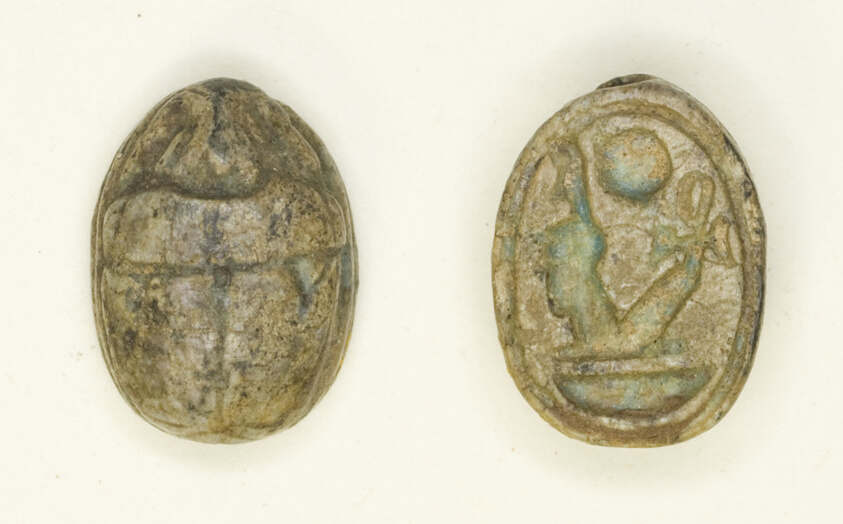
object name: Costume and Accessories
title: Scarab: Nebmaatra (Amenhotep III)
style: new kingdom, eighteenth dynasty, egyptian, ancient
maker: Egyptian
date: New Kingdom, Dynasty 18, Reign of Amenhotep IIII (about 1390–1352 BCE)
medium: Faience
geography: Egypt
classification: scarab; ancient art; costume; faïence (composite material)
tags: Hieroglyphs, insects, kings